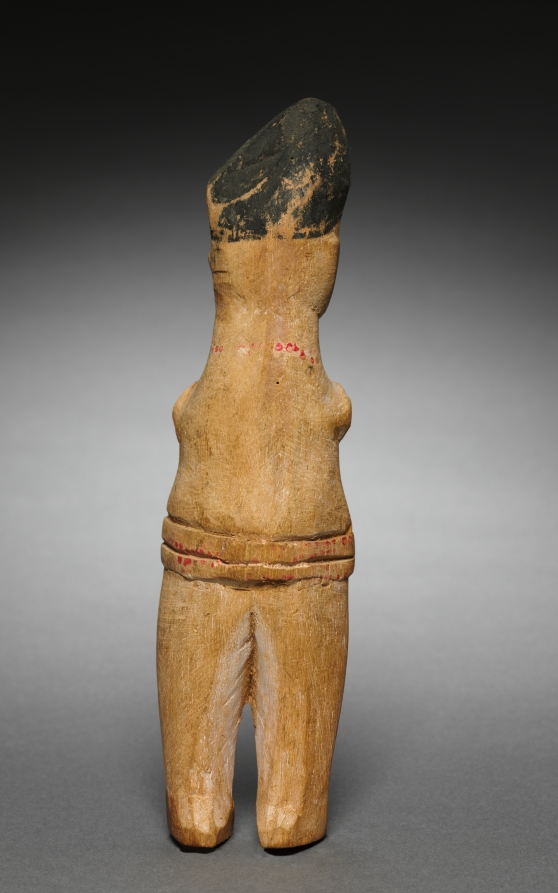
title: Doll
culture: Africa, West Africa, Nigeria, Ibibio style, unknown artist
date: 1900s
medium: Wood, kaolin, and paint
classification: Sculpture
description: Young Ibibio girls would play with dolls for fun. The dolls also took on deeper significance when a girl entered seclusion to go through preparations for adulthood and marriage, representing her future children and promoting her fertility. The kaolin (white clay) that once covered the figures' bodies has been worn off, possibly through handling during play. Thin lines represent uli, a kind of body painting. Upraised, foreshortened hands with open fingers were typical of dolls carved by Ibibio people from the Anang group.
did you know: Dolls like this were sold at markets where they were purchased as symbolic playthings for girls or souvenirs for tourists.